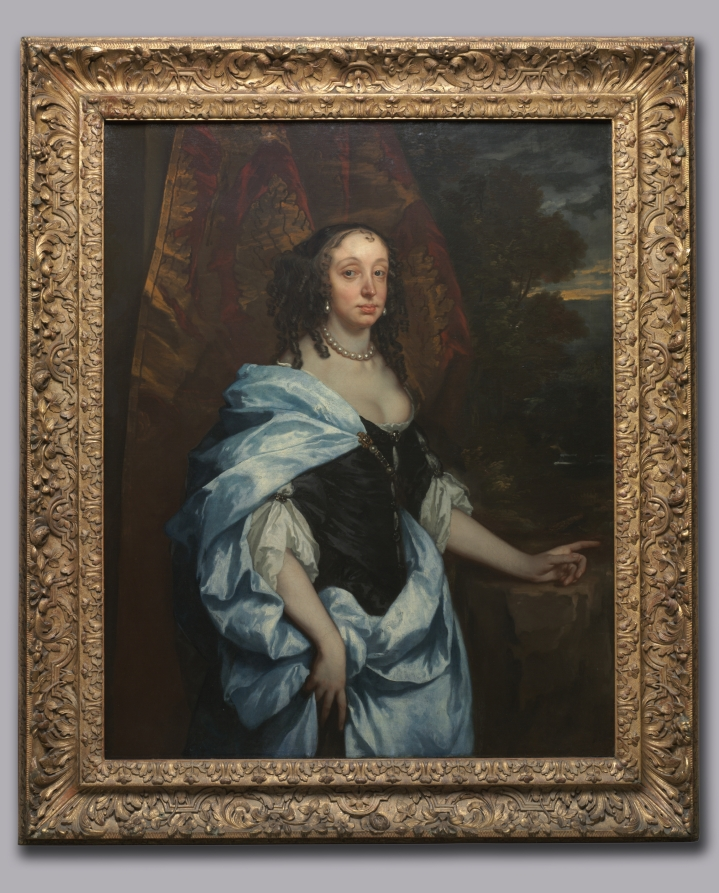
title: Portrait of Mrs. Leneve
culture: England, 17th century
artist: Peter Lely (British, 1618–1680)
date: c. 1657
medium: oil on canvas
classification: Painting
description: This woman’s heavily lidded eyes, fleshy chin, and slender fingers conform to 17th-century ideals of beauty, but when the museum acquired this painting in 1942, her features had been extensively overpainted to bring her more in line with modern standards of beauty. This later intervention included lowering the sitter’s eyebrows, reducing her prominent eyes and lips, and adding curls to make her forehead appear smaller. Mrs. Leneve now appears as the fashionable artist Peter Lely originally intended.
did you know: Long, slender fingers signified aristocratic elegance when this portrait was painted.